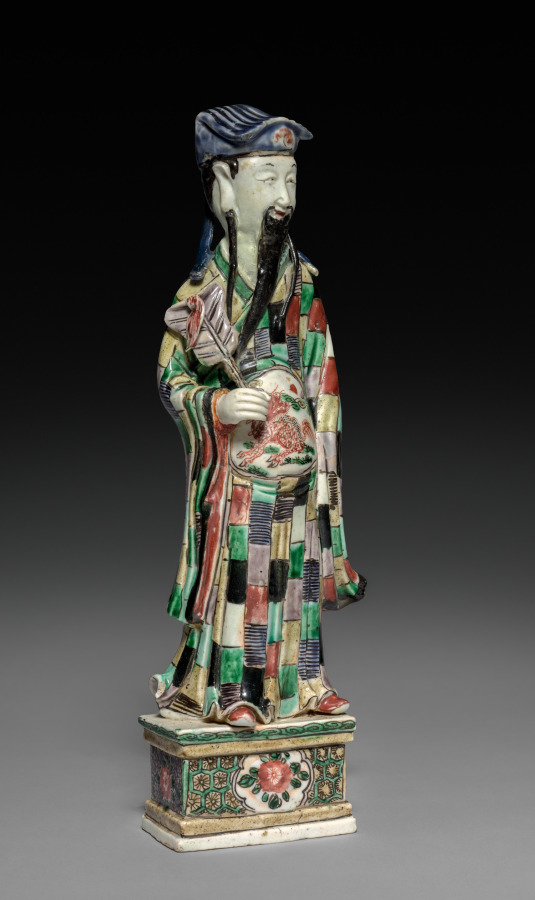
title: Daoist Immortal Zhongli Quan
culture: China, Jiangxi province, Jingdezhen kilns, Qing dynasty (1644-1911), Kangxi reign (1662-1722)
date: 1662–1722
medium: porcelain with famille verte overglaze enamel decoration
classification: Ceramic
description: This porcelain figure represents Zhongli Quan as a scholar. He is wearing a scholar’s hat and carries a scroll on his back. He holds a fan that, according to legend, could bring the dead to life. Thus, he also bears the auspicious meaning of longevity. On his bare belly, the potter painted a qilin, a mythical auspicious creature that turns his head to the sun. The same design in different colors also decorates his back.